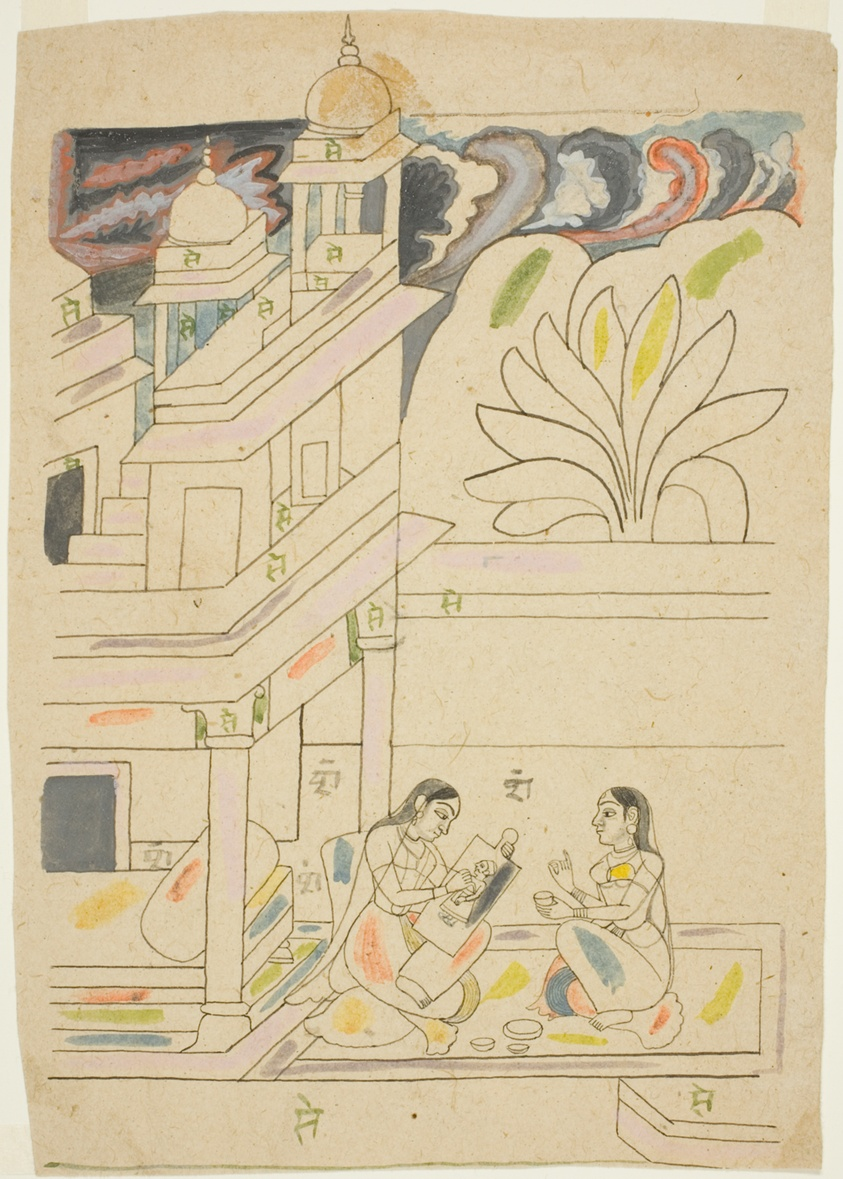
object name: Painting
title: Dhanasri Ragini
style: South Asian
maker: India; Rajasthan, Bundi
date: 18th century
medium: Black ink and touches of watercolor on buff paper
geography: India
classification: miniature painting; painting; asian art